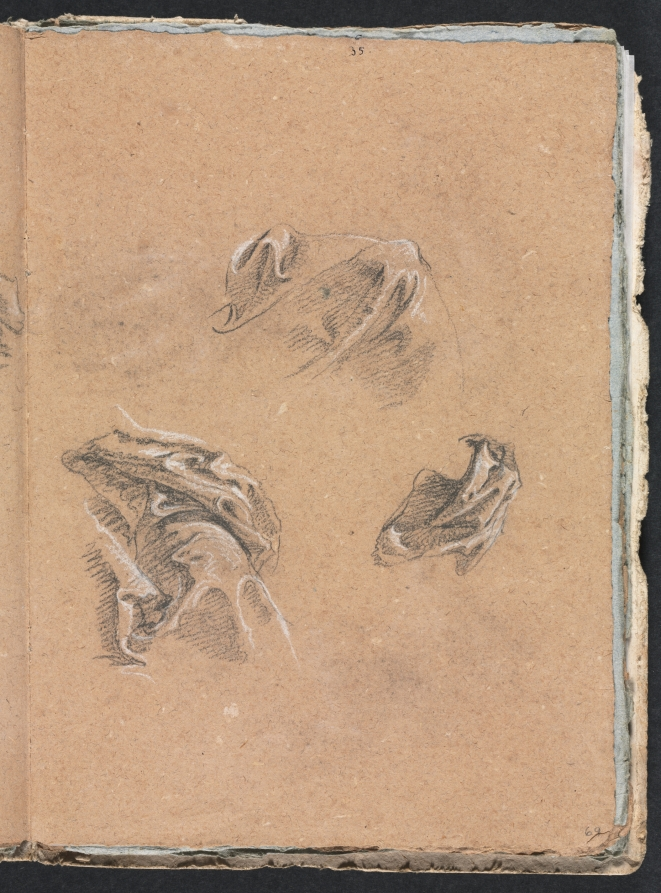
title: Verona Sketchbook: Drapery studies (page 69)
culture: Italy, 18th century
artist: Francesco Lorenzi (Italian, 1723–1787)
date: 1760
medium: black chalk with white heightening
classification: Bound Volume